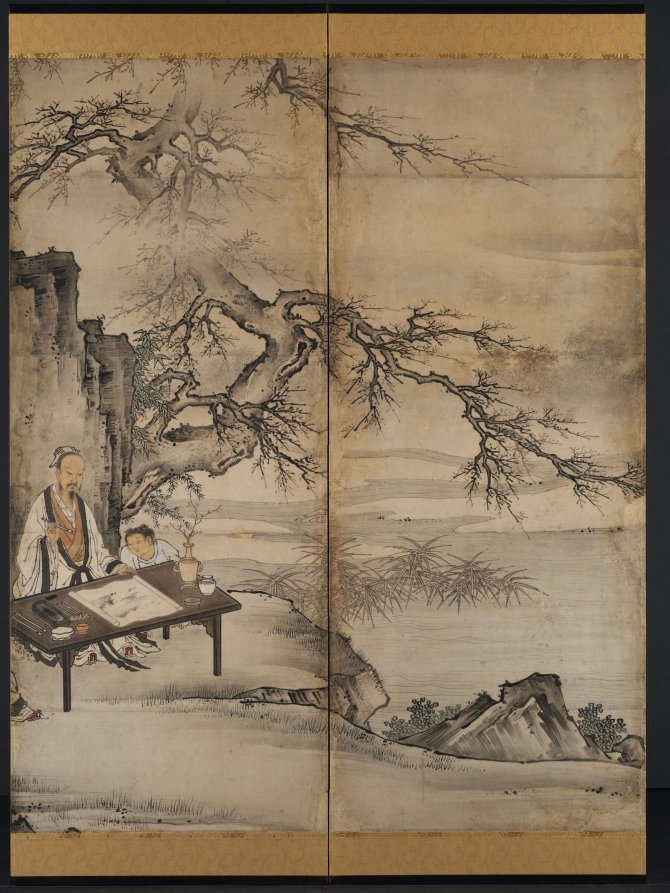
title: The Four Accomplishments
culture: Japan, Momoyama period (1573–1615)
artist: attributed to Kano Shōei (Japanese, 1519–1592)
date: late 1500s–early 1600s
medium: One of a pair of six-panel folding screens; ink and slight color on paper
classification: Painting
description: This is one of a pair of screens showing a group of elite Chinese gentlemen and their servants in the countryside. One man is considering his painting-in-progress. Historically, practicing or admiring painting was considered a skill essential for cultured men in China.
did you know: Although the painter captures his companion's attention, his young servant is having a nap.